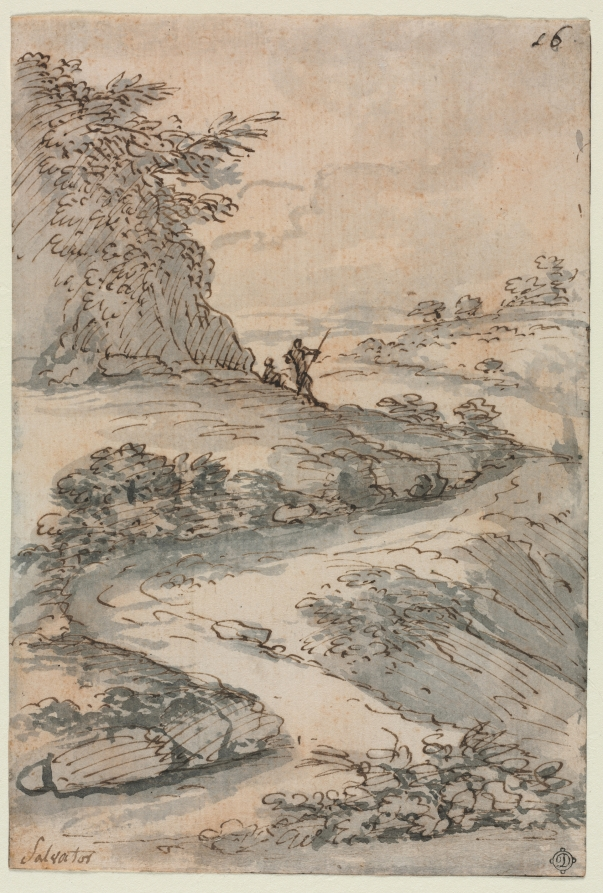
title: Figures on a Winding Road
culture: Italy, 17th century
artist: Salvator Rosa (Italian, 1615–1673)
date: mid-1600s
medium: Pen and brown ink and brush and gray and brown wash, traces of framing lines in brown ink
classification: Drawing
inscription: [by artist?], lower left, in brown ink: Salvator ; upper right, in brown ink (over gray ink): 16. ; VERSO OF SECONDARY SUPPORT (now removed), lower left and lower center, in graphite: from the Collection of E. Desperet (1804-1865) of Paris ; lower center, in graphite: Rosa ; lower center, in graphite: Salvator Rosa / 1614-1673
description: The vitality of Rosa’s landscapes is indebted to his practice of constantly drawing the world around him, incorporating fresh observations of nature into his wild and awe-inspiring mature landscapes. Rosa’s drawings from the 1650s showcase his interest in capturing the mysterious and savage qualities of nature. Through sinewy paths or anthropomorphic cliffs, the environment overwhelms the small figures, evoking the power and magical qualities of nature.